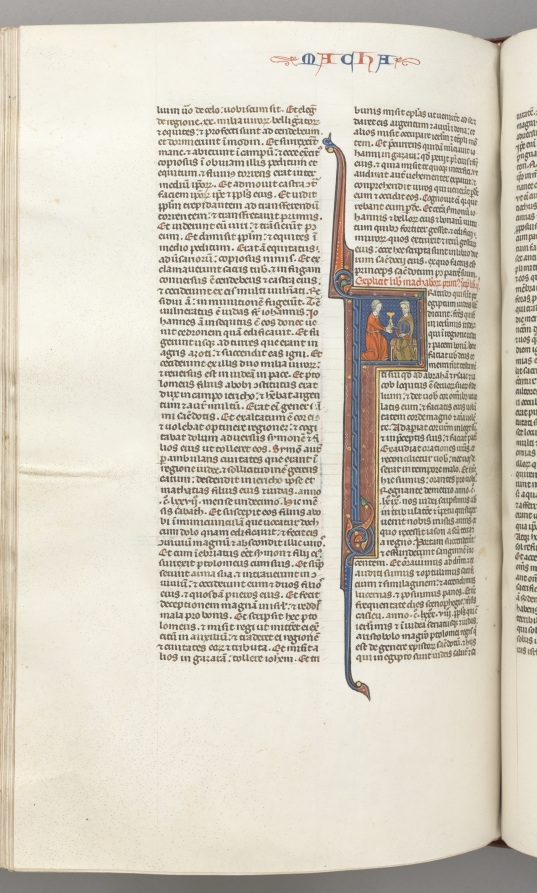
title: Fol. 382v, Maccabees II, historiated initial F, a golden chalice presented to a Jew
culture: Southern France, Toulouse(?), 13th century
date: c. 1275–1300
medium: ink, tempera and gold on vellum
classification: Bound Volume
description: Biblical manuscripts were highly prized and important possessions of churches, monasteries, cathedral schools, and universities throughout medieval Europe. The biblical texts were known as the vulgate, the translations made by Saint Jerome in the fourth century from Hebrew and Greek into Latin, which became the definitive and official Latin version of the Roman Church. In the 13th century, the bible was, for the first time, produced as a single volume with an officially sanctioned sequence to its books and chapters as illustrated by this example. The very extensive decoration of this bible is arranged hierarchically to indicate the relative importance of the various texts so that full or almost full-page initials mark the openings of the first prologue, Genesis, and the first Gospel; historiated initials mark the beginning of each book and illuminated initials mark the Prologues.